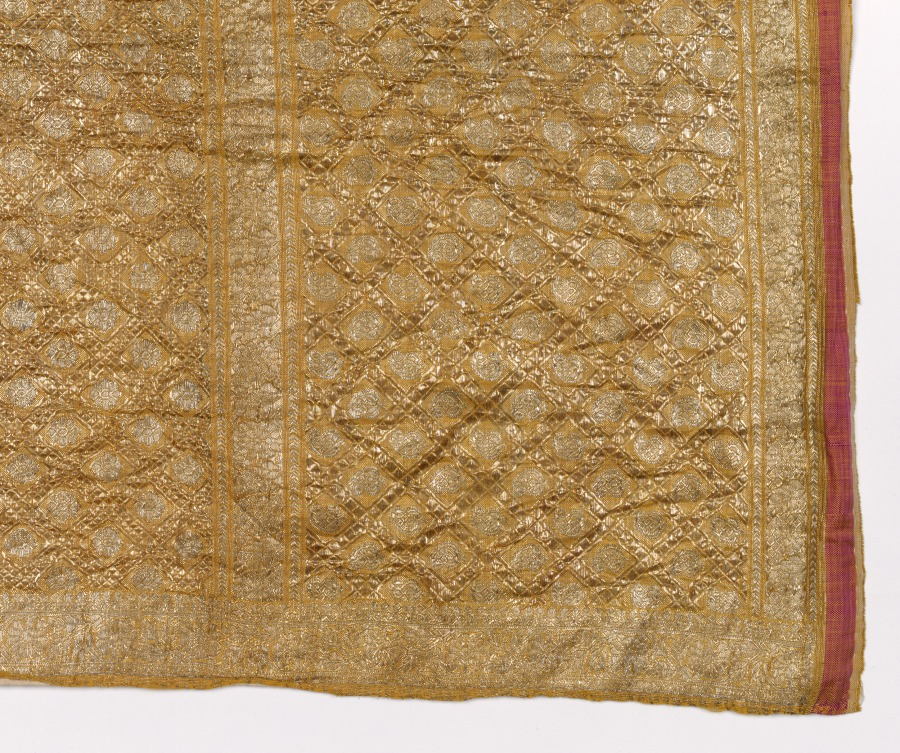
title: Sari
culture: India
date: early 1900s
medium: silk, metallic thread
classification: Textile